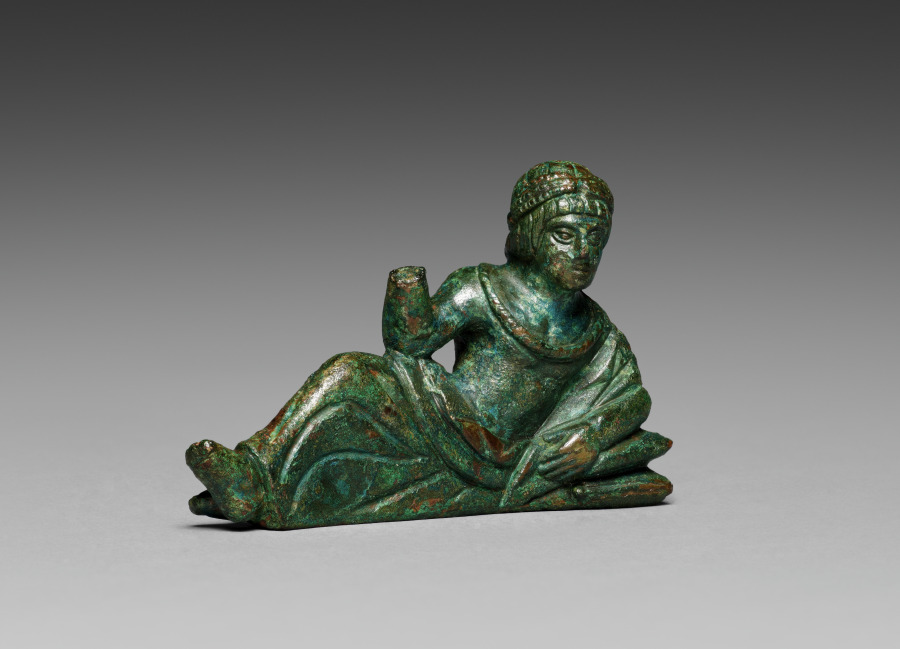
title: Vessel Ornament of Banqueter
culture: Etruscan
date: probably 400–375 BCE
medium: bronze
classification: Sculpture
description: This bronze banqueter figurine was one of six once adorning the rim of a large basin, now lost. Cast in molds with individualized details, most have grooves on their underside to attach to the basin. Minute traces of gilding remain on areas of clothing and skin (mostly visible only under magnification), suggesting that they may have been completely gilded. Two handles in the form of hippocampi, horses with serpentine tails, also belonged to the basin and are now displayed at the Michael C. Carlos Museum at Emory University. The basin may have been used to hold liquid for a banquet, or was perhaps funerary. This reclining bronze figurine’s left arm rests on the drapery covering his shoulder. His right arm is raised and broken at the wrist. Garlands rest on his head and chest. Traces of gilding remain in the garlands and drapery folds. The figurine is very similar to 1987.157, suggesting that he may have held a phiale mesomphalos, a shallow bowl used for wine libations to the gods.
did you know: Representations like this figurine suggest that Etruscan banqueters may have worn garlands made of flowers or leaves.